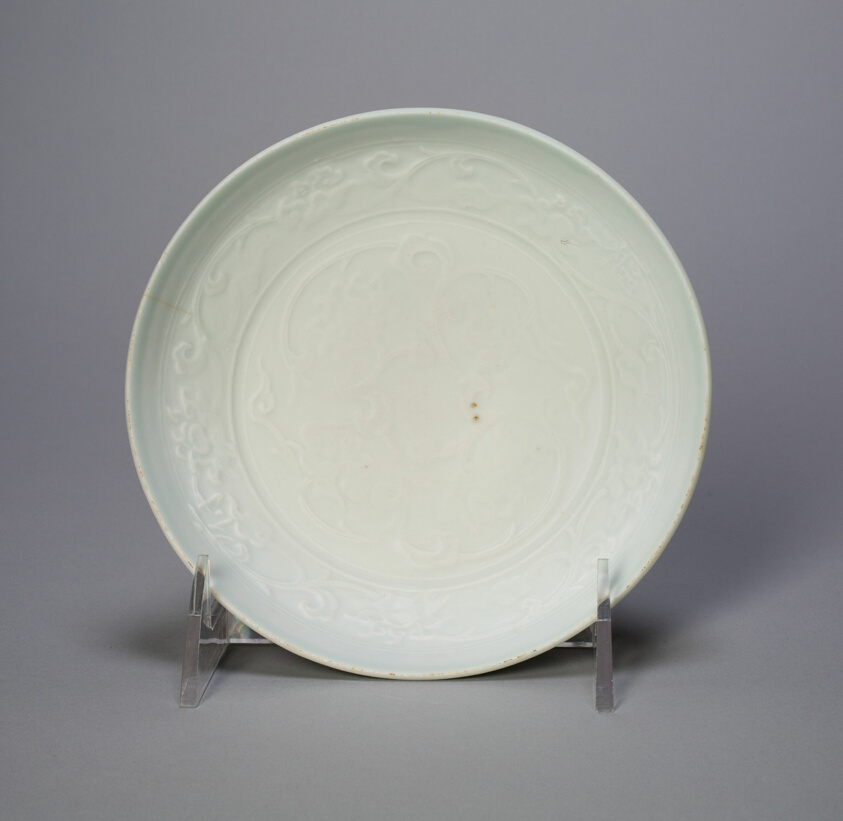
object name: Vessel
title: Bowl with Stylized Floral Scrolls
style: Chinese (culture or style)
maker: China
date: Yuan dynasty (1279–1368), 14th century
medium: Luanbai ware; porcelain with transparent or opaque white glaze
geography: China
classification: bowl; porcelain; dish (vessel); asian art; ceramics; vessel